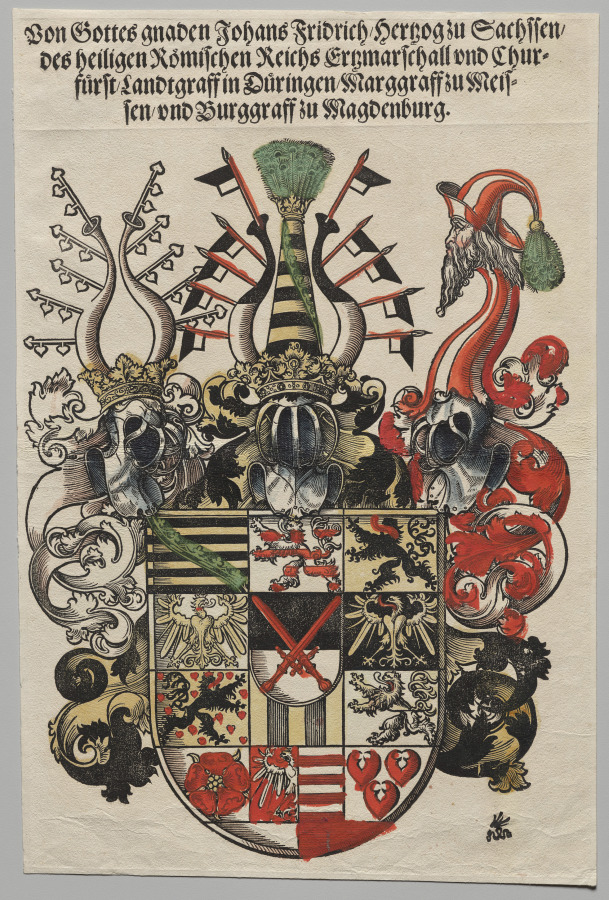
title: Coat of Arms of John Frederic, Elector of Saxony, called the Magnanimous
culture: Germany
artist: Lucas Cranach (German, 1515–1586)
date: 1546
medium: hand-colored woodcut with letterpress text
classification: Print